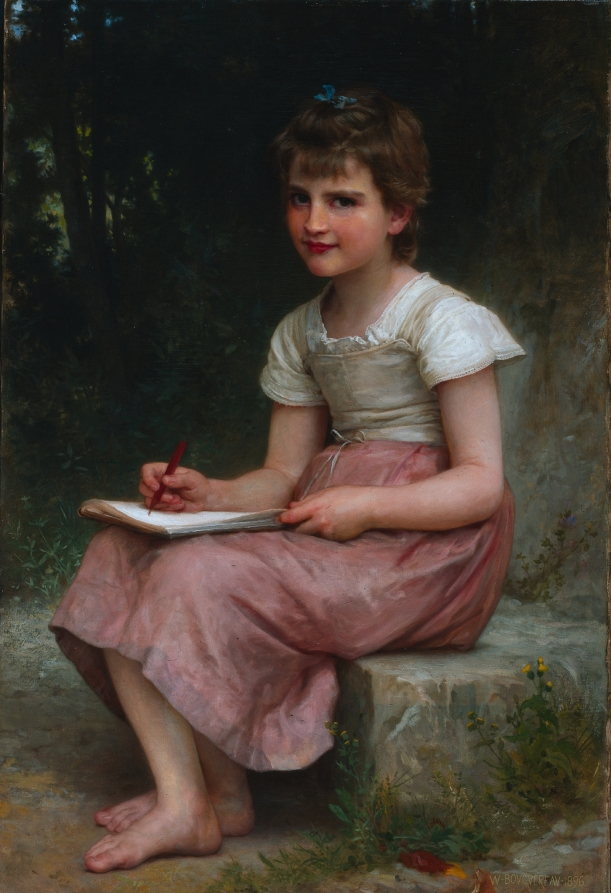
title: A Calling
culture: France, 19th century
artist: William Adolphe Bouguereau (French, 1825–1905)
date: 1896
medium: oil on fabric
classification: Painting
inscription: Signed lower right: w. bouguereau 1896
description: Seated on a stone step in the countryside, a young girl has realized that her calling in life is to be an artist. Bouguereau was famous for his innovative depictions of children. In 1900 a critic wrote, "[F]ew artists have represented childhood with more tenderness, charm, and spirit than Bouguereau . . . [H]e has invented the most picturesque, the most pleasing, the most original scenes of an almost endless variety." Bouguereau was no less famous for his remarkably life-like images. Here he convincingly captures the girl's rough clothing, soft skin, and intense gaze. Bouguereau painted this work in La Rochelle, a harbor city on France's west coast. During the later years of his life, Bouguereau—by then wealthy and famous—made a habit of spending summers in La Rochelle. There the artist lived in a mansion he owned near the port, working in a greenhouse he had converted into a studio or in the countryside. While in La Rochelle, Bouguereau chose his models from among farm workers, families of local fishermen, or his own servants.